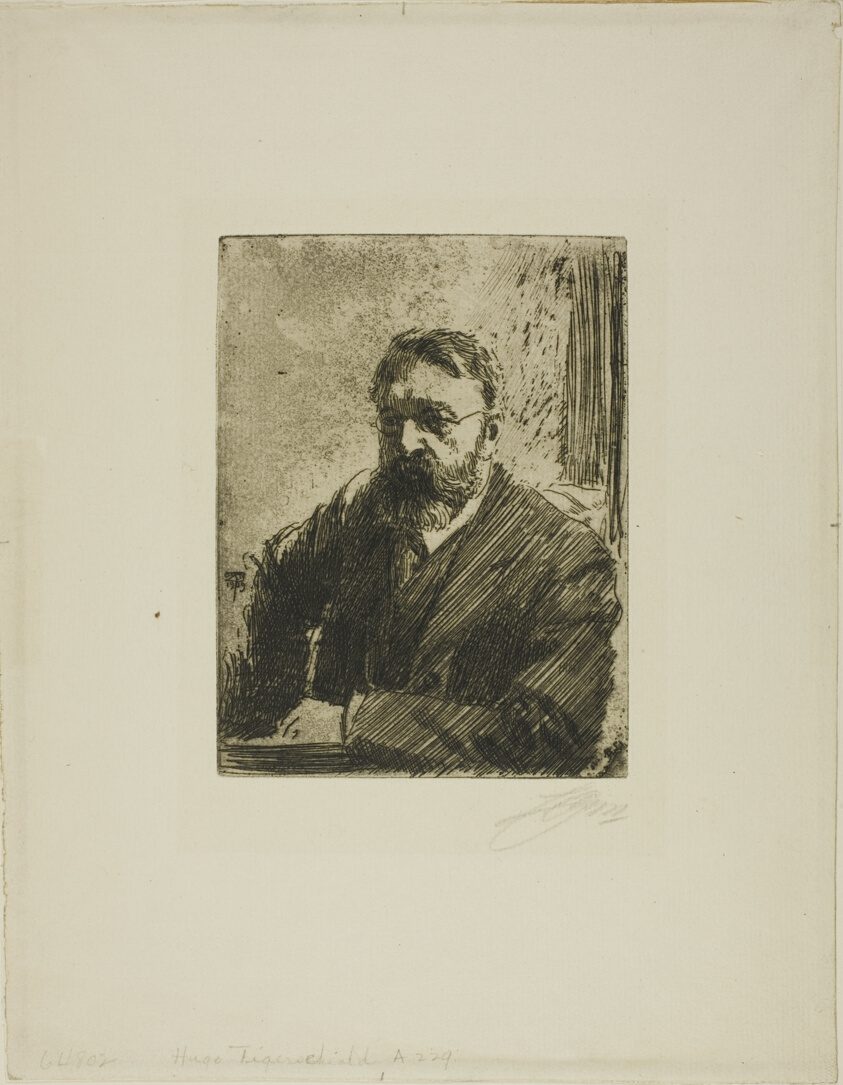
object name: Print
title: Hugo Tigerschiöld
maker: Anders Zorn (Swedish, 1860-1920)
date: 1909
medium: Etching on ivory laid paper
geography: Sweden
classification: etching; print; prints and drawing